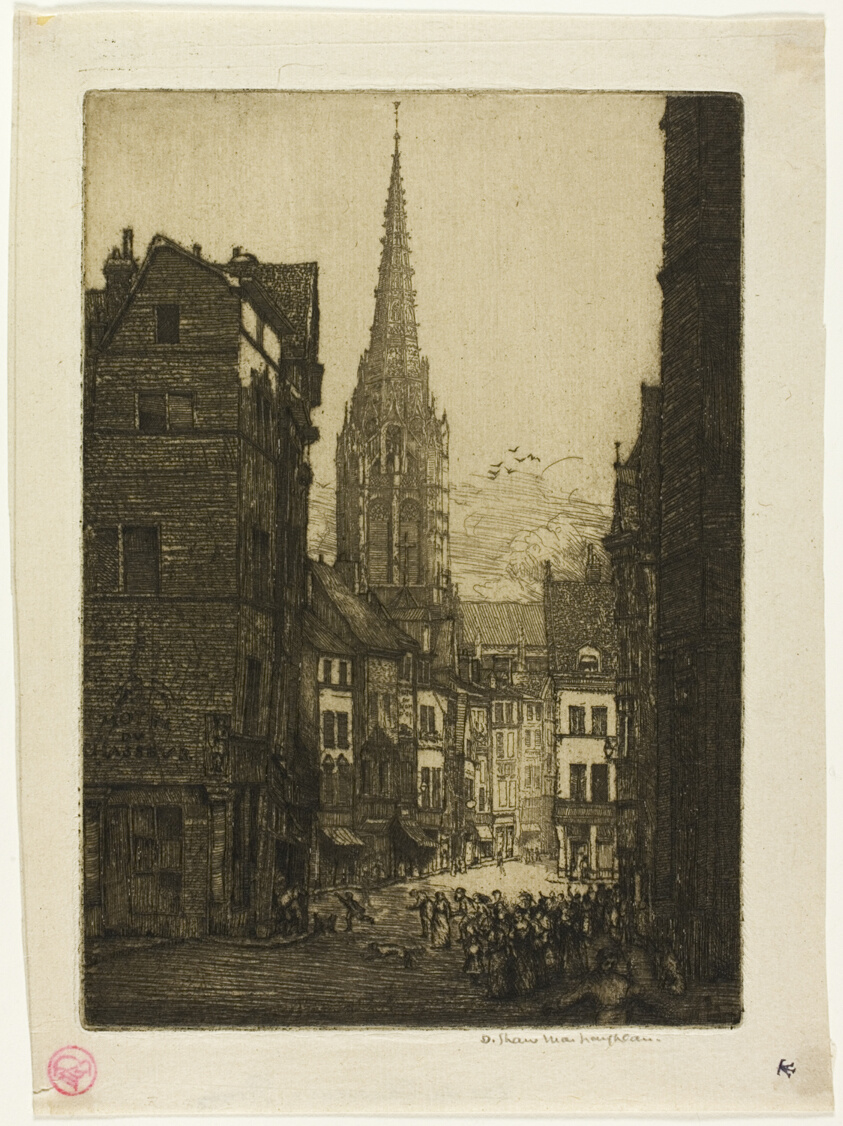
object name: Print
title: Rue du Chasseur, Rouen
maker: Donald Shaw MacLaughlan (American, born Canada, 1876-1938)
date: 1903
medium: Etching in black on Japanese paper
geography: United States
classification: etching; print; prints and drawing